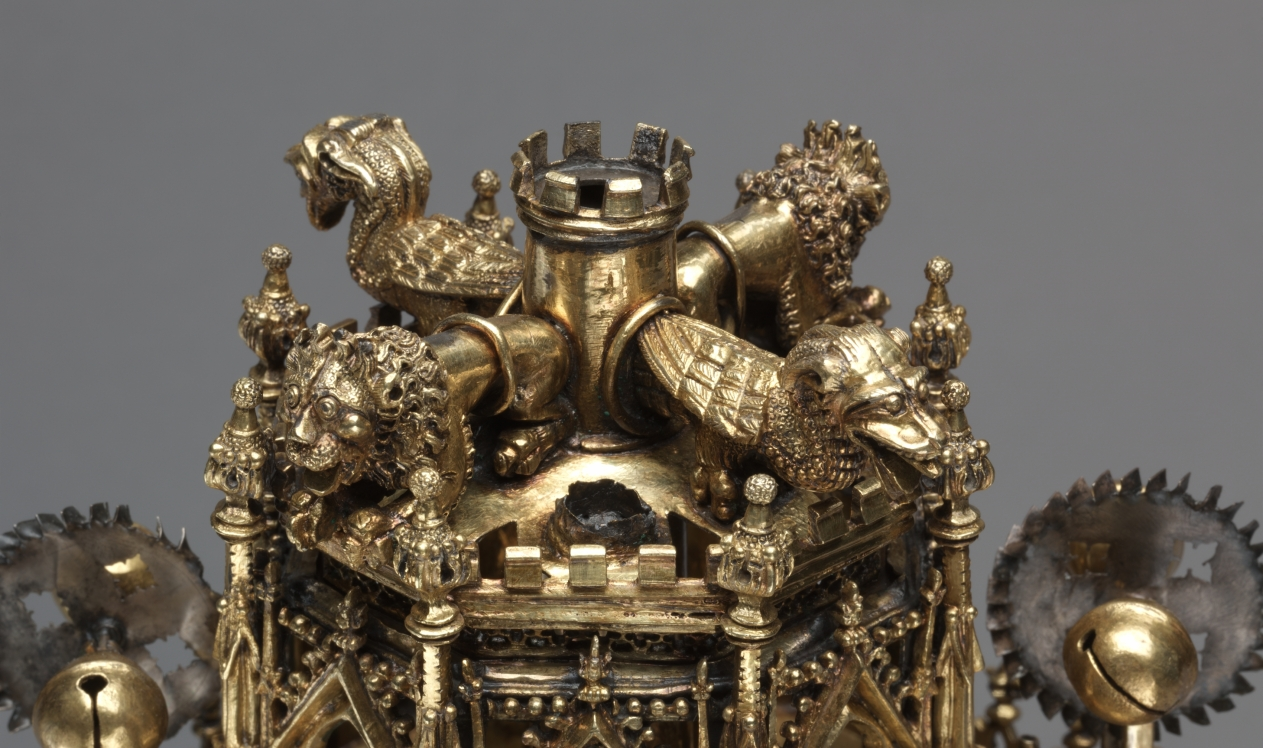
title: Table Fountain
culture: France, Paris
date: c. 1320–40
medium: gilt-silver and translucent enamels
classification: Metalwork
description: Conceptually and stylistically, this object is beyond all else a piece of Gothic architecture in miniature with vaults, pinnacles, columns, and traceried arches. Though the artist who created it is unknown, he was unquestionably inspired by the great Gothic buildings of his time. The table fountain is a three-tiered assembly combining cast elements with bent sheets of gilt-silver. To these have been attached a series of enamel plaques representing grotesque figures, some of which play musical instruments. Water wheels and bells were added to capture motion and sound. The rich detail, precious materials, and involved ornamentation of this deluxe object suggest it would have been expensive to produce and highly treasured by its original owner, someone of high status, and would have been deployed as an object of spectacle. This is the most complete example of its type known to survive from the Middle Ages. Medieval inventories reveal that small fountains like this, often taking various forms, and generally made from precious metals, once existed in large numbers, thus making the Cleveland table fountain an extremely rare object.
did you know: This fountain with its minute architectural details and finely made enamel plaques displayed the wealth and refinement of the owner as it entertained his guests. Imagine hearing the ringing of the tiny bells when this fountain was in use.